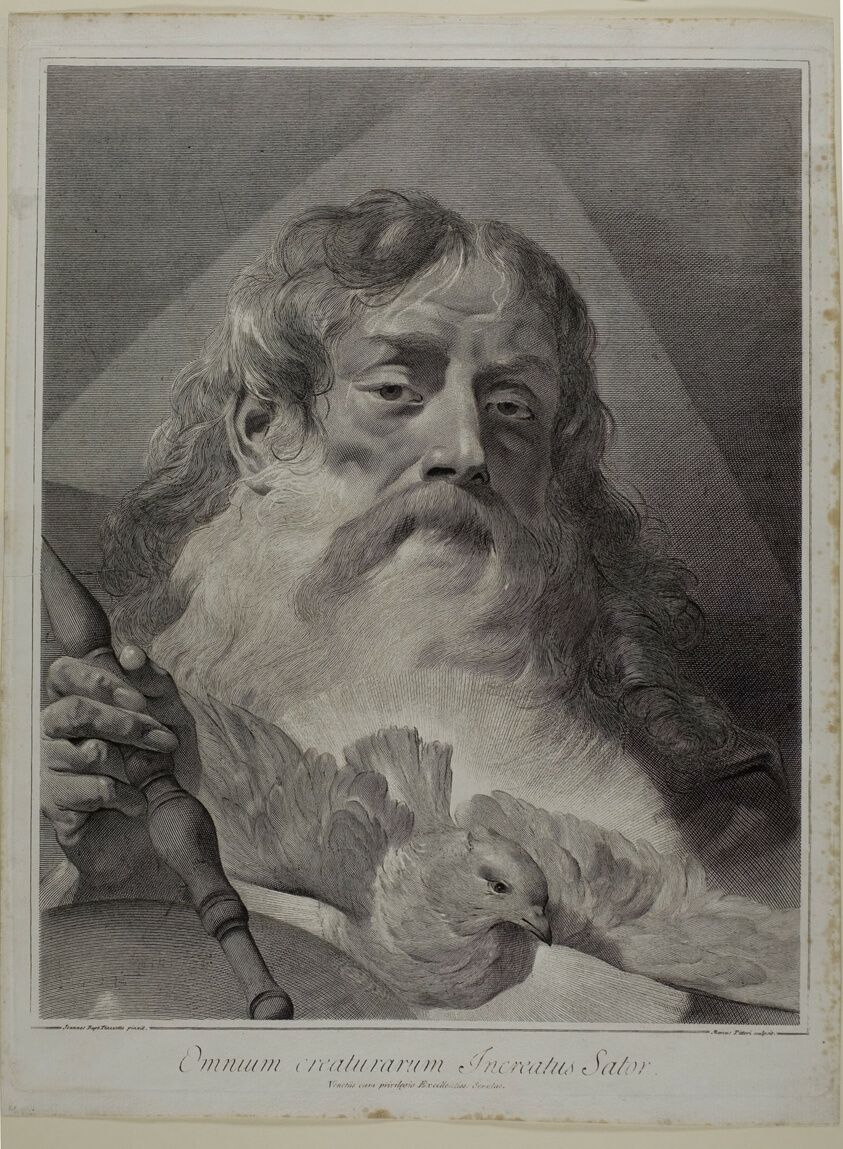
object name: Print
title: God the Creator, from The Holy Family and the Twelve Apostles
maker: Giovanni Marco Pitteri (Italian, 1702-1786); after Giovanni Battista Piazzetta (Italian, 1682-1754)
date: 1742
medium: Engraving in black on paper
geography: Italy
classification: engraving; print; prints and drawing